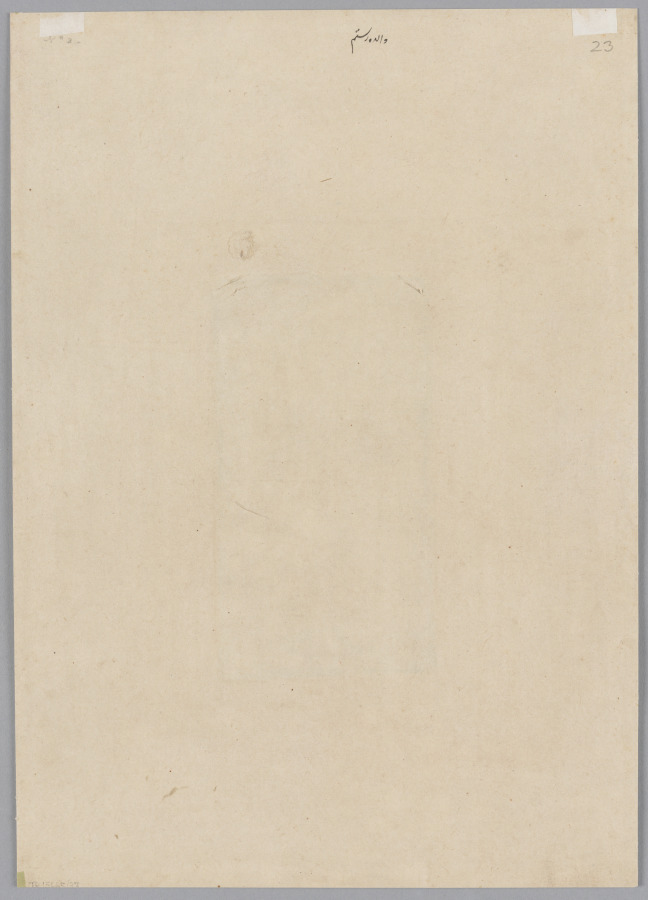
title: A woman mistakes a cow for the Angel of Death, from a Lights of Canopus (Anwar-i Suhaili) of Kashifi (Iranian, d. 1504)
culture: Mughal India, court of Jahangir (1605–1627)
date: c. 1610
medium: Gum tempera on paper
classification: Drawing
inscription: walida-i-rustam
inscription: Zal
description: In this gently colored, amply shaded painting, an ailing girl lies listless, eyes barely open, as an attendant fans her. A cow who got her head stuck in a pot has entered the yard in confusion. The girl’s mother, who had been weeping and praying to exchange her own life for the health of her daughter, thought the Angel of Death had come to take her. Pointing to heaven, the woman begs that her daughter be taken instead. Outside the gate, a wandering holy man dozes, indicating this scene takes place in the evening, and a calf annoys her mother as she eats.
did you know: A previous owner identified the scene as the first cesarean section.